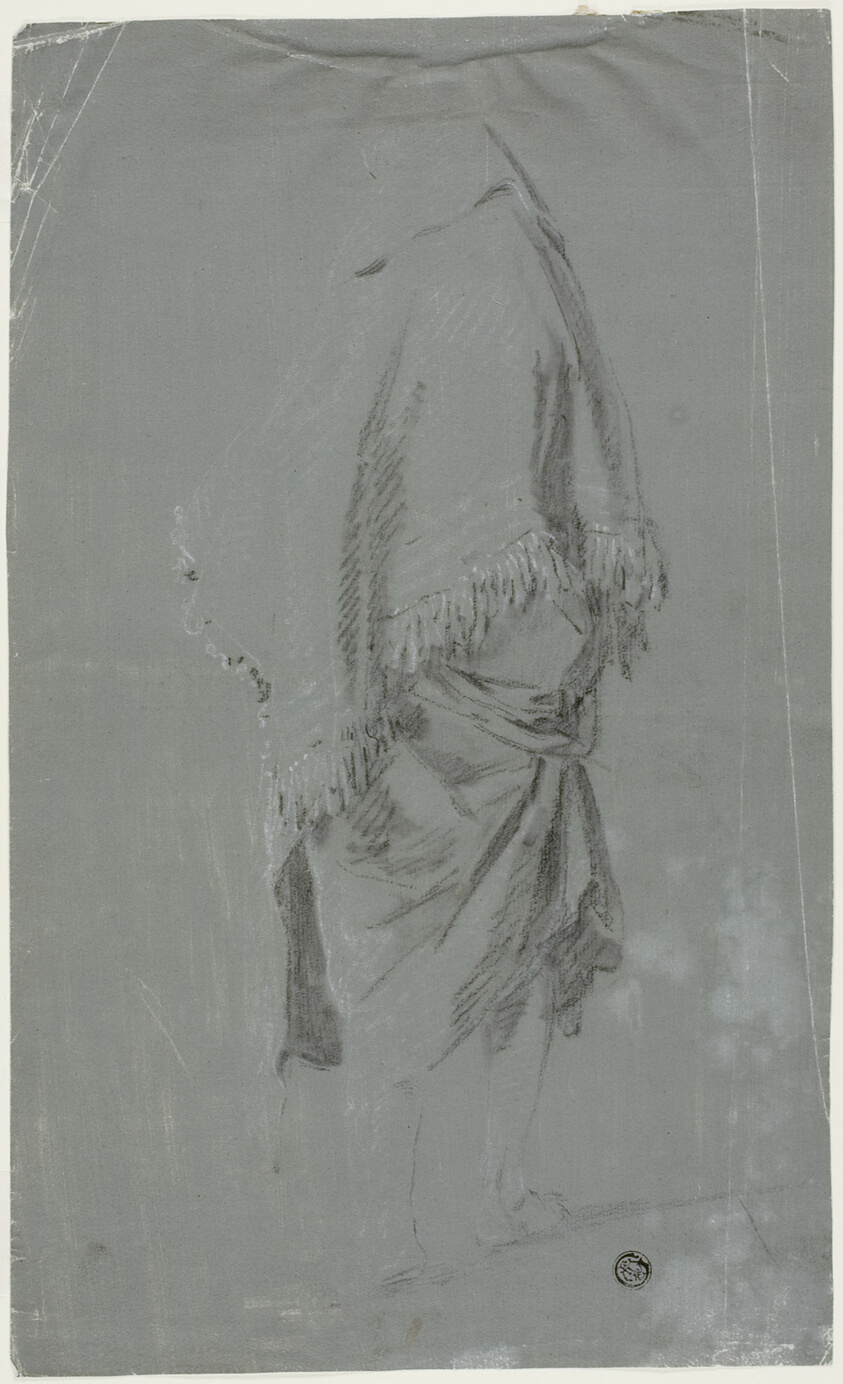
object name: Drawing and Watercolor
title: Shawled Woman Seen from the Back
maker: Pierre-Jacques Volaire (French, 1729-1799)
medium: Black and white chalk, on gray prepared ground, on ivory laid paper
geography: France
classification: chalk; drawings (visual works); prints and drawing